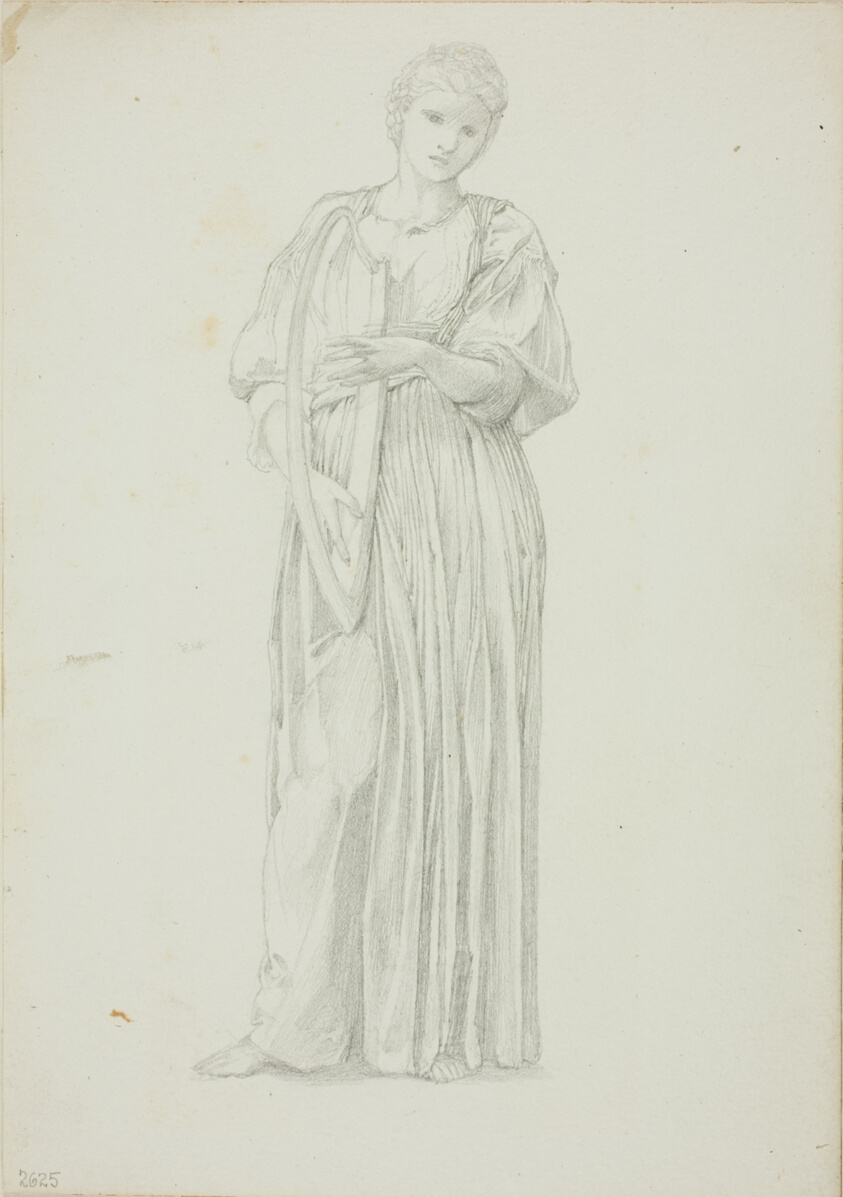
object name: Drawing and Watercolor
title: Draped Figure of Woman Playing on a Harp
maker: Sir Edward Burne-Jones (English, 1833-1898)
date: c. 1873–77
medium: Graphite on ivory wove paper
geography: England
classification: graphite; drawings (visual works); prints and drawing